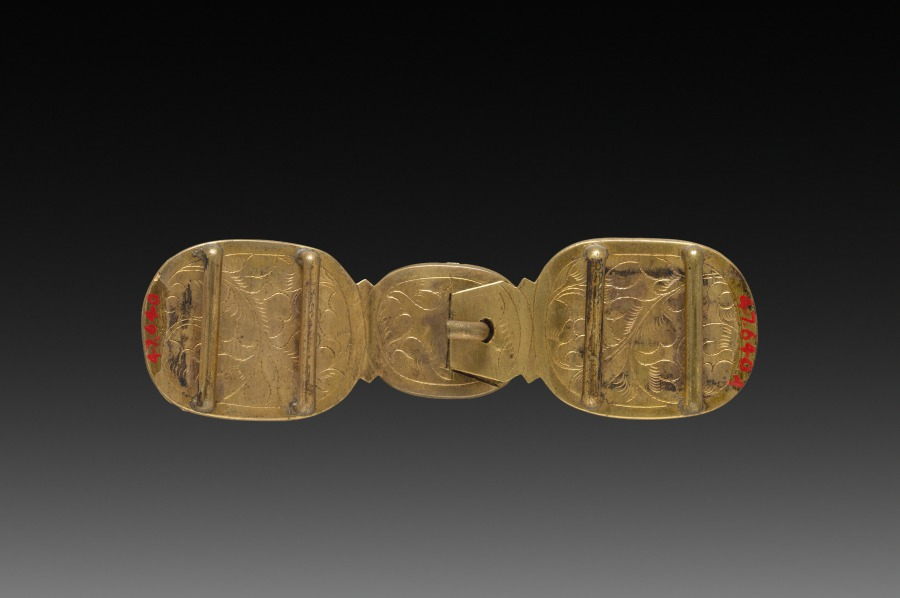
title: Buckle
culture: China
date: 1900s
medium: gilt brass, engraved and set with rose quartz and gray stone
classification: Jewelry